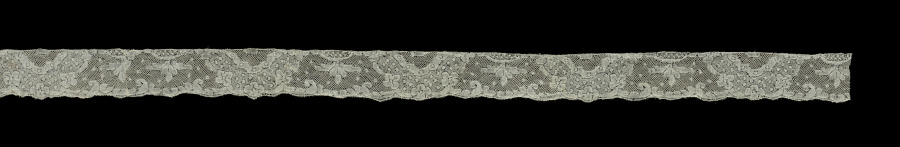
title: Lace Edging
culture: Belgium, Binche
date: 1700s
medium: Linen: bobbin lace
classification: Lace